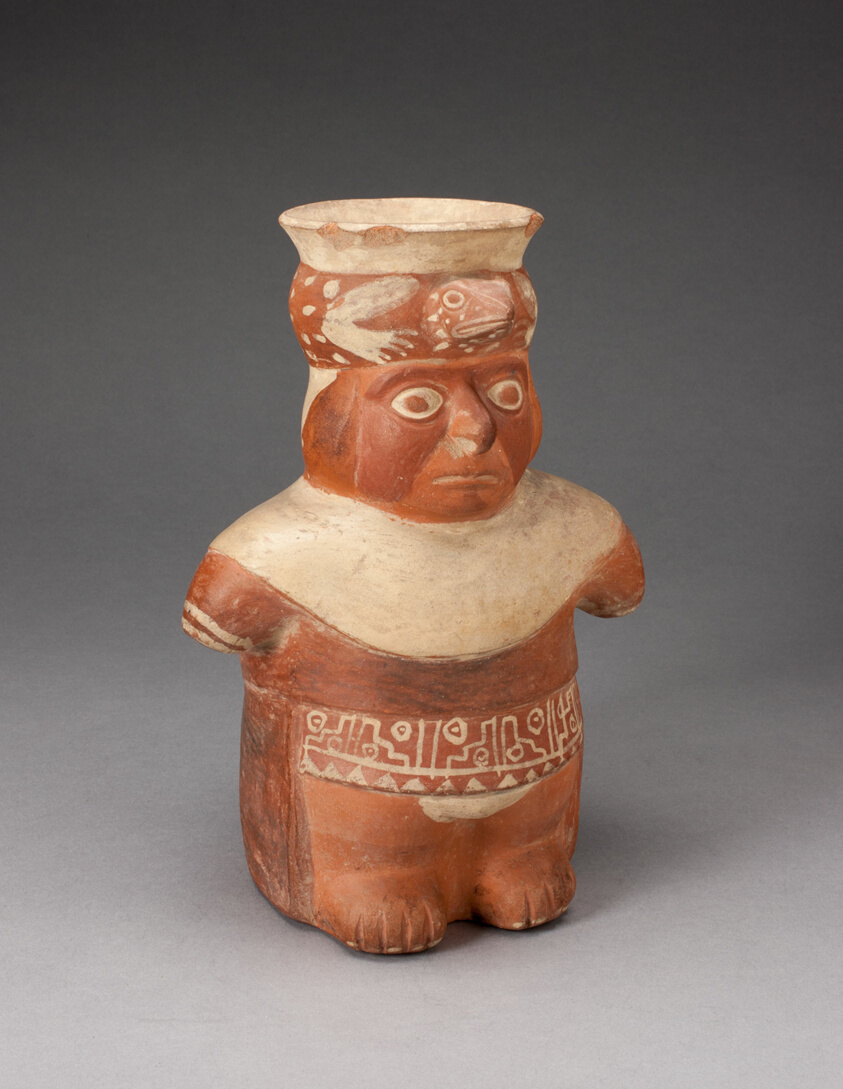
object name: Vessel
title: Jar in the Form of a Figure with Patterned Waistband and Lizard Headdress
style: moche, mochica iii, mochica, early intermediate period, Pre-Columbian, americas, Arts of the Americas, andean, andes, south american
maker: Moche (North coast, Peru)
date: 100 BCE–500 CE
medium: Ceramic and pigment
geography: Peruvian North Coast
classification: earthenware; ceramics; vessel; art of the americas